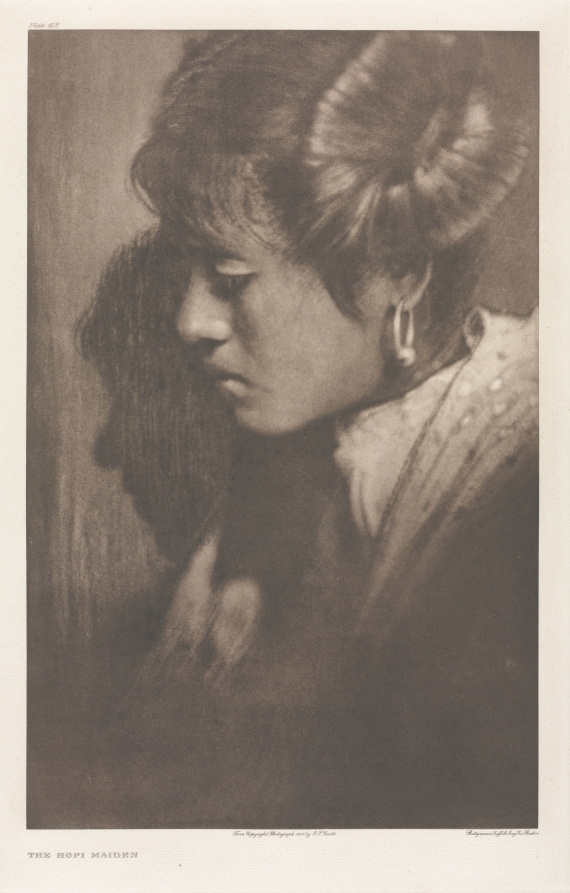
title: Portfolio XII, Plate 412: The Hopi Maiden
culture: America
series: The North American Indian: being a series of Portfolios picturing and describing the Indians of the United States, the Dominion of Canada, and Alaska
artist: Edward S. Curtis (American, 1868–1952)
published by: The University Press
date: 1905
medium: photogravure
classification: Portfolio